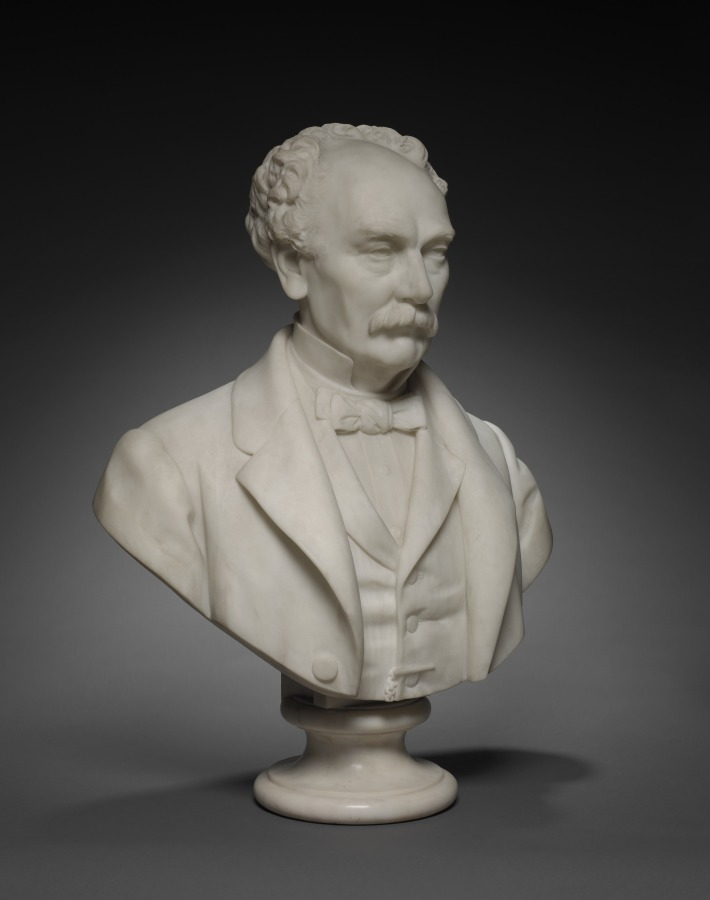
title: Bust of Hinman B. Hurlbut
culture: Italy, Rome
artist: Giovanni Cintselli (Italian, 1832–1883)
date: c. 1870–83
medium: marble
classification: Sculpture